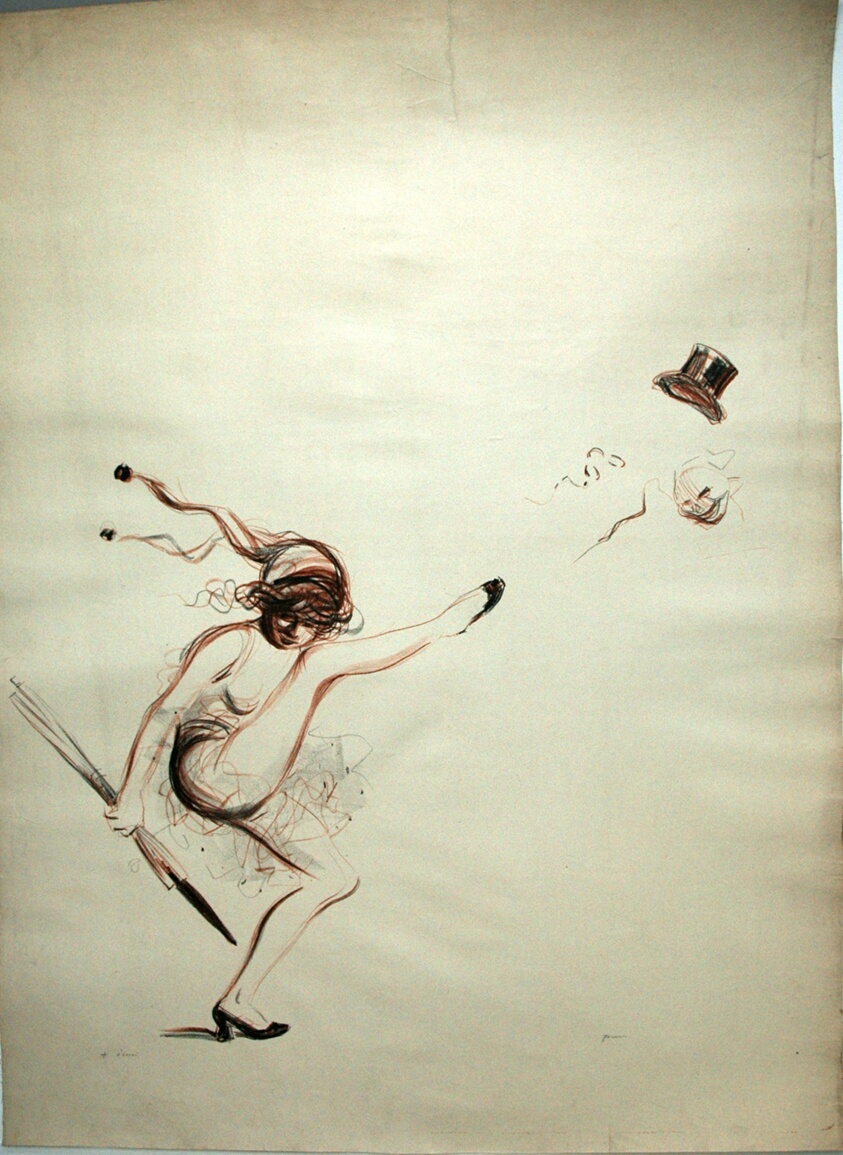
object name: Print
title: 1st Exhibition of the Humorists (2nd Version)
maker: Jean Louis Forain (French, 1852-1931); Printed by Eugene Verneau & Henri Chachoin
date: 1911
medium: Color lithograph on cream wove paper laid down on linen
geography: France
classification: lithograph; print; prints and drawing